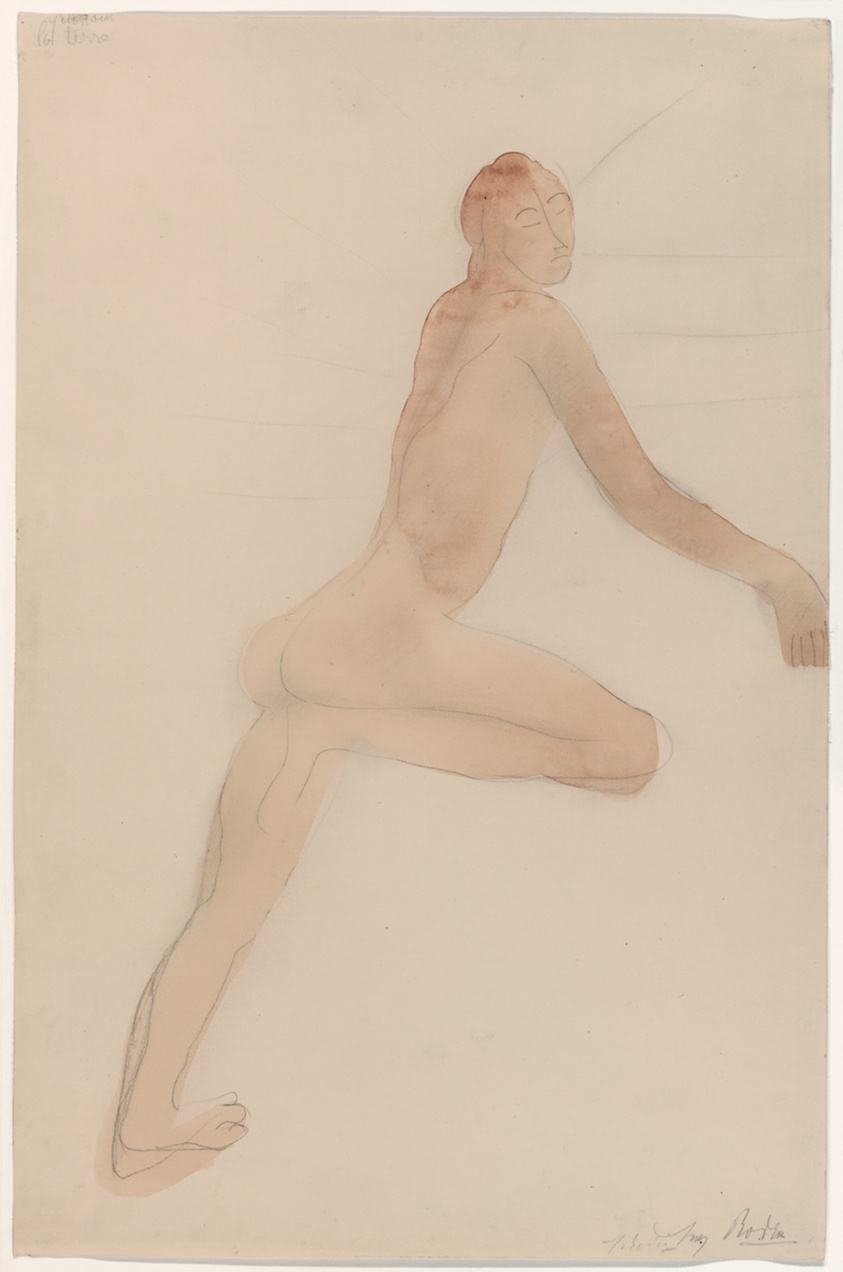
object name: Drawing and Watercolor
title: Leaving the Earth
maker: Auguste Rodin (French, 1840-1917)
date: 1900/05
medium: Watercolor and graphite, with smudging, on cream wove paper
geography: France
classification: watercolor; drawings (visual works); prints and drawing